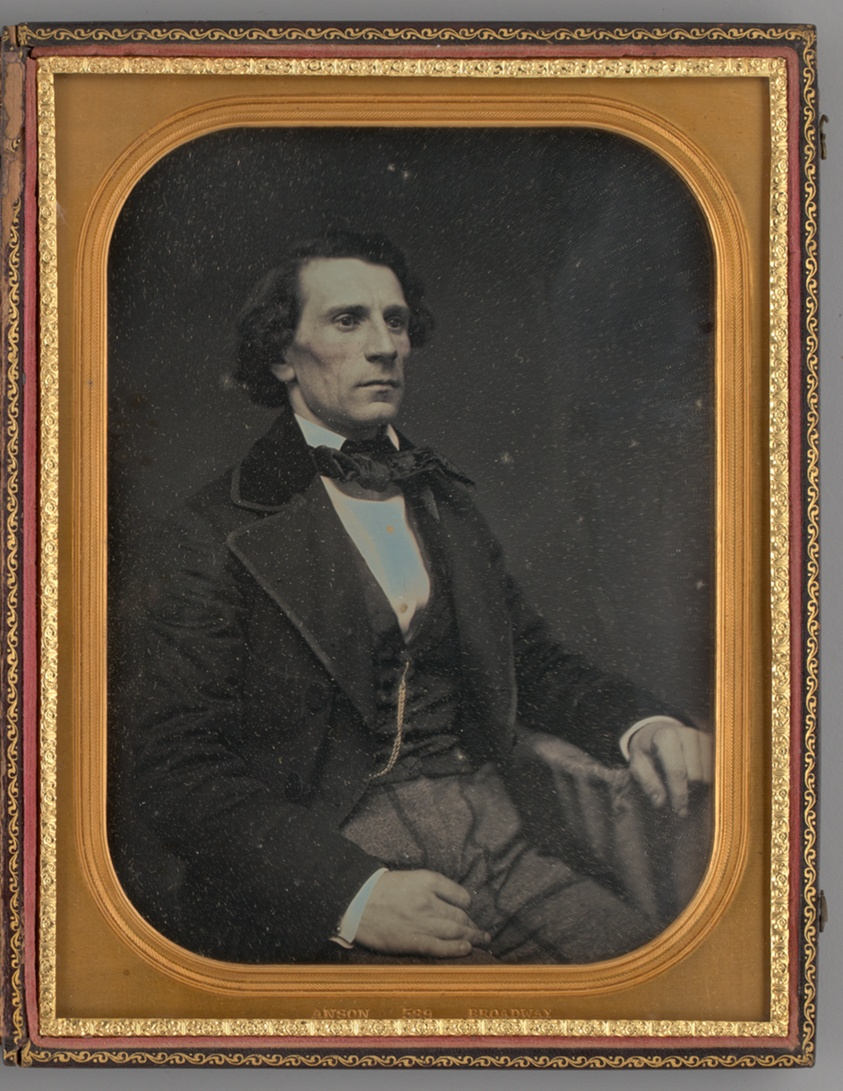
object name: Photograph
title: Untitled (Portrait of a Seated Man)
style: 19th century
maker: Rufus Anson (American, active 1851-1867)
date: 1855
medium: Daguerreotype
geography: United States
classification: portrait; photograph; photographic process; photography; portrait; daguerreotype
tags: lundberg collection, portrait, Male, portraits, portraits: male subject